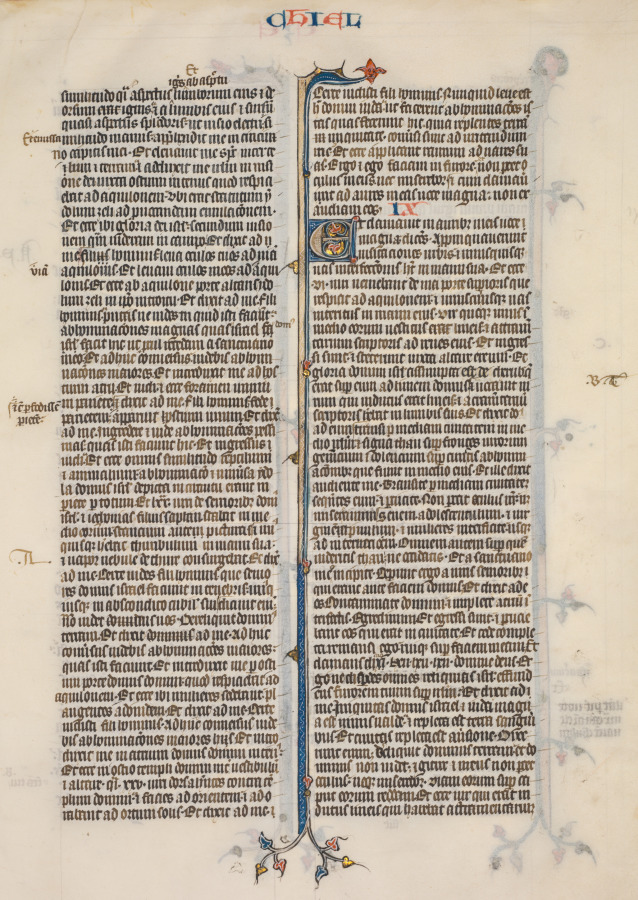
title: Bifolium from a Bible: Initial E[t factum est] with Ezekiel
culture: France, Paris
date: c. 1290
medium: ink, tempera, and gold on vellum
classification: Manuscript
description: This large initial E on the left page introduces the Book of Ezekiel. The prophet is represented in the midst of his apocalyptic visions. Ezekiel's call to prophecy began as a vision showing God enthroned among four creatures, each with four wings and the face of a man, lion, ox, and eagle, respectively. These apocalyptic beasts recur in the Book of Revelation and were developed by the medieval Church into symbols of the Evangelists: Matthew, Mark, Luke, and John. Since medieval manuscripts were not paginated, this large initial provided a clear visual cue for the reader to help locate the text of Ezekiel within the manuscript.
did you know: This bifolium was likely once part of a Carthusian Bible; the initials in the margin are part of a unique reading system used by Carthusian monks.